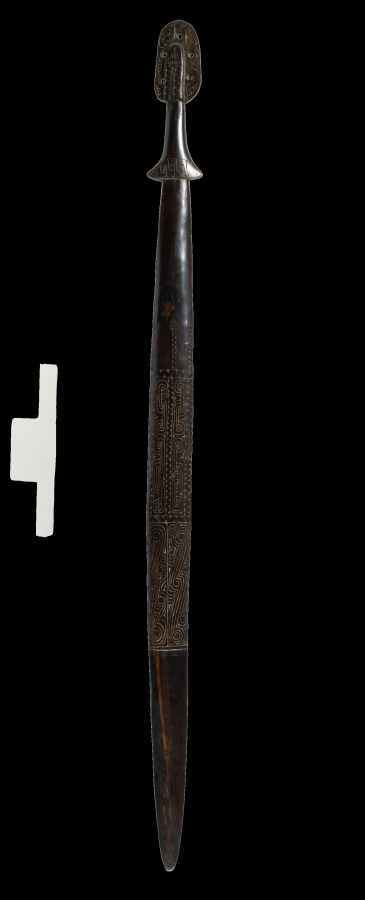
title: Club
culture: Melanesia, New Guinea, Massim Area, Trobriand Islands, 20th century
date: before 1930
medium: wood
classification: Sculpture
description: Craftsmen from the Trobriand Islands (off the coast of eastern New Guinea) decorated both utilitarian and ceremonial objects with elegant incised patterns. Usually these wooden objects were red or deep black in color. The engraved designs, depicting stylized frigate birds or human faces and figures, are infilled with lime. Drums, dance wands, shields, and canoe ornaments, together with spells and incantations, were part of the hereditary wealth of local Massim chiefs.